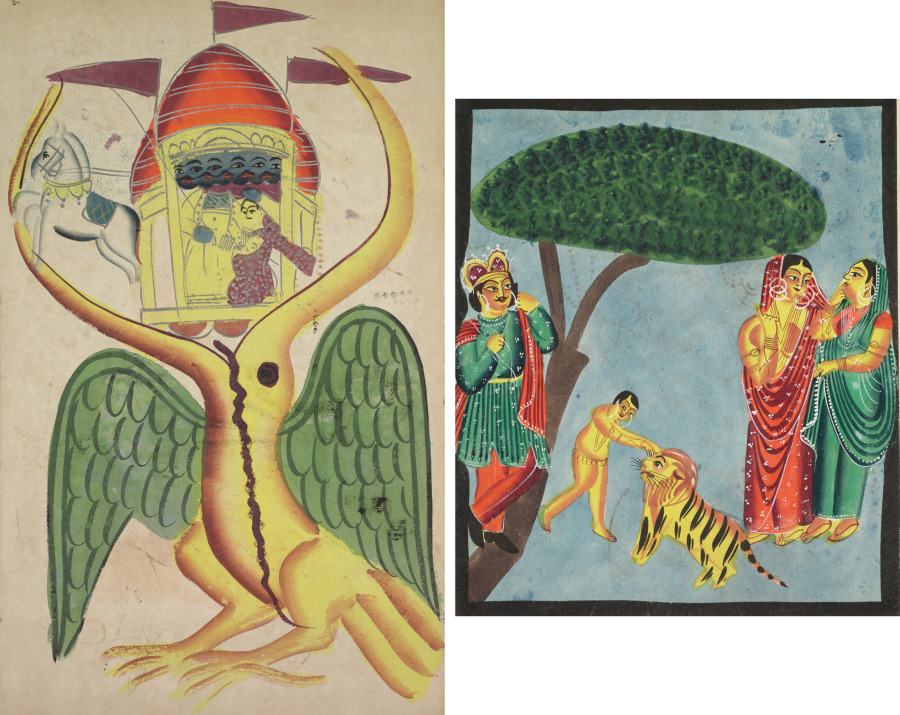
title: Leaf from a Kalighat album: Jatayu hinders Ravana’s chariot, trying to prevent the abduction of Sita (recto); Dushyanta watching his son Bharat playing with the tiger at the end of the Abhijnanashakuntalam (verso)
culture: Eastern India, Bengal, Kolkata, Kalighat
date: c. 1890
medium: Gum tempera, graphite, and ink on paper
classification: Painting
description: This is an image of the ten-headed demon Ravana and Sita, wife of Rama, in a chariot held in the beak of the bird Jatayu, king of the vultures. When Ravana abducted Sita and carried her off in the flying chariot, Jatayu, a great devotee of Rama, engaged him in aerial battle to rescue her. Unsuccessful, he fell to earth, mortally wounded. It was from Jatayu that Rama found out about his wife. This story is from the epic Ramayana (The Journey of Rama). Here, in the Bengali version of this episode, Jatayu attempts to swallow the chariot in order to kill Ravana, but is forced to vomit it out once he realizes that Sita is on board. Jatayu is portrayed as a hero rather than as a failure.